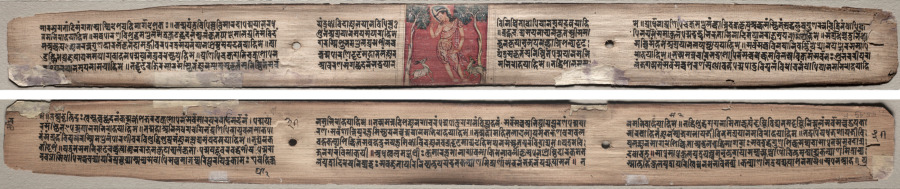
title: Folio 37 from a Gandavyuha-sutra (Scripture of the Supreme Array): Sudhana and a pair of antelopes (recto); text (verso)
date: 1000–1100s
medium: gum tempera and ink on palm leaf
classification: Painting